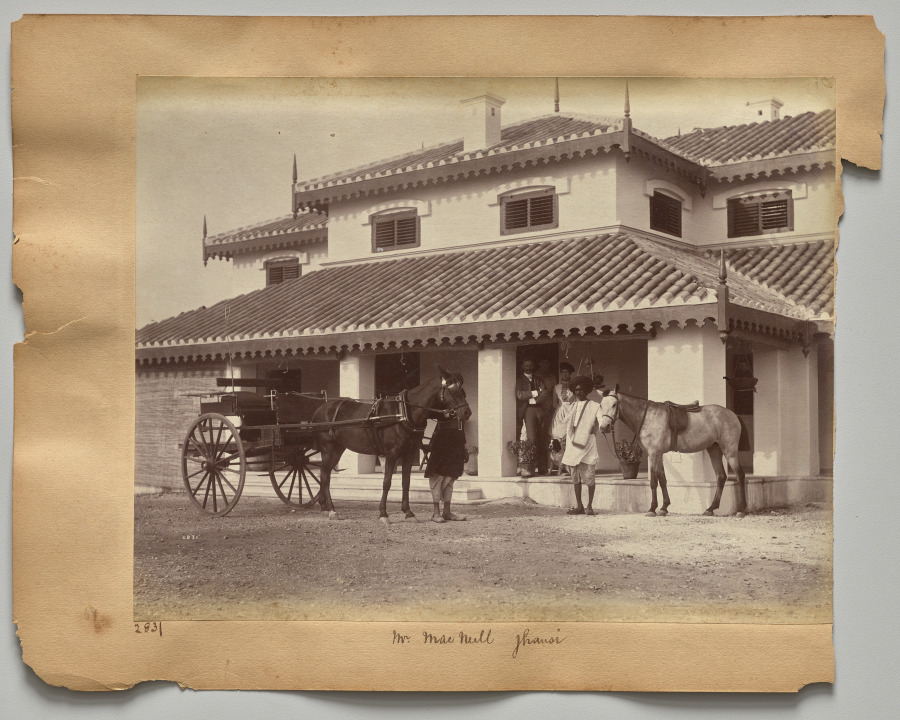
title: Mr. MacNull, Jhansi (verso)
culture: India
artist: Raja Deen Dayal (Indian, 1844–1905)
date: c. 1882–87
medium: albumen print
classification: Photograph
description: These photographs are part of an album, now disassembled, of around 105 photographs taken in India between 1885 and summer 1887 that provide glimpses into the lives of the British colonial elite and royal and upper-class Indians. The museum holds another group of 37 pictures from this album (2016.266), which was probably commissioned by a British civil servant visiting or working in India around 1888 as a personal souvenir of his experiences there.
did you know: Raja Deen Dayal is regarded now, and was considered during his lifetime, to be India’s most important 19th-century photographer.